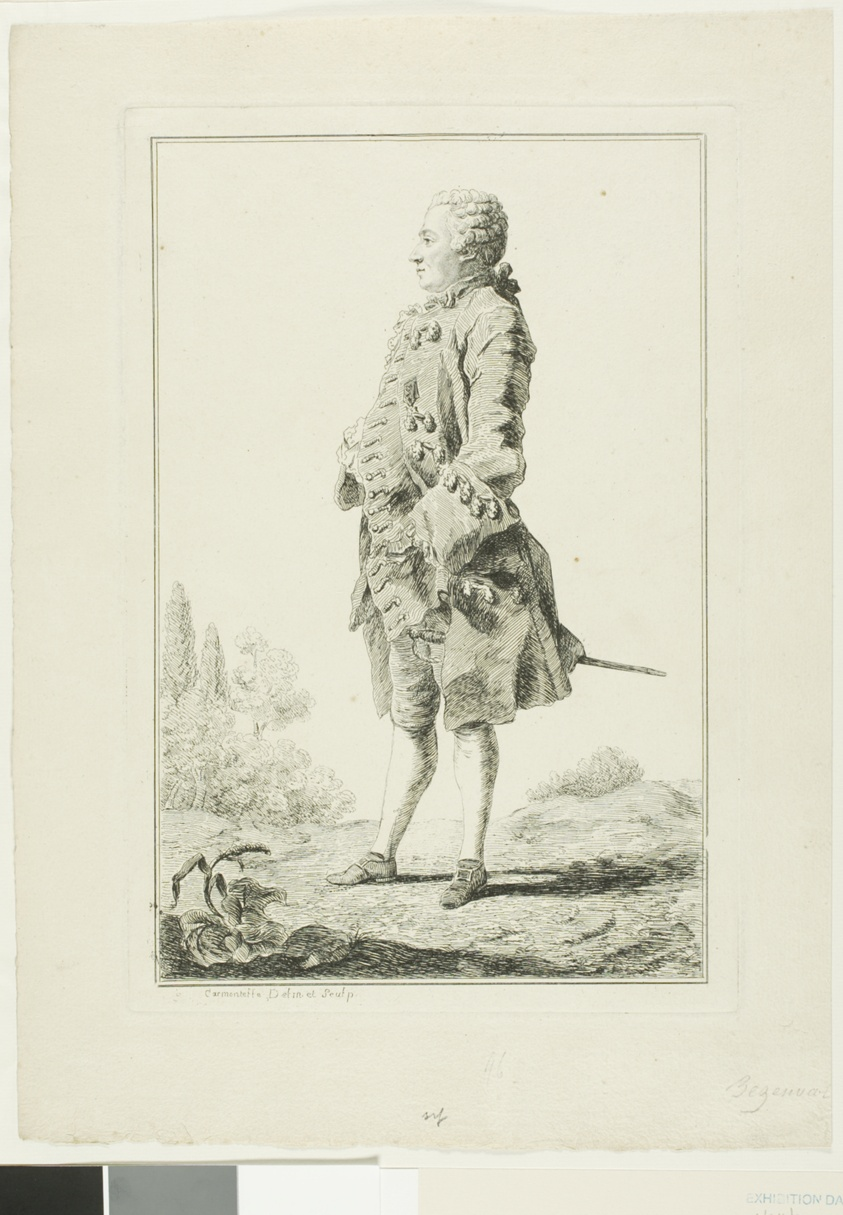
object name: Print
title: Peter Josef-Victor de Benseval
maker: Louis Carrogis de Carmontelle; French, 1717-1806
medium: Etching on cream laid paper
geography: France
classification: etching; print; prints and drawing